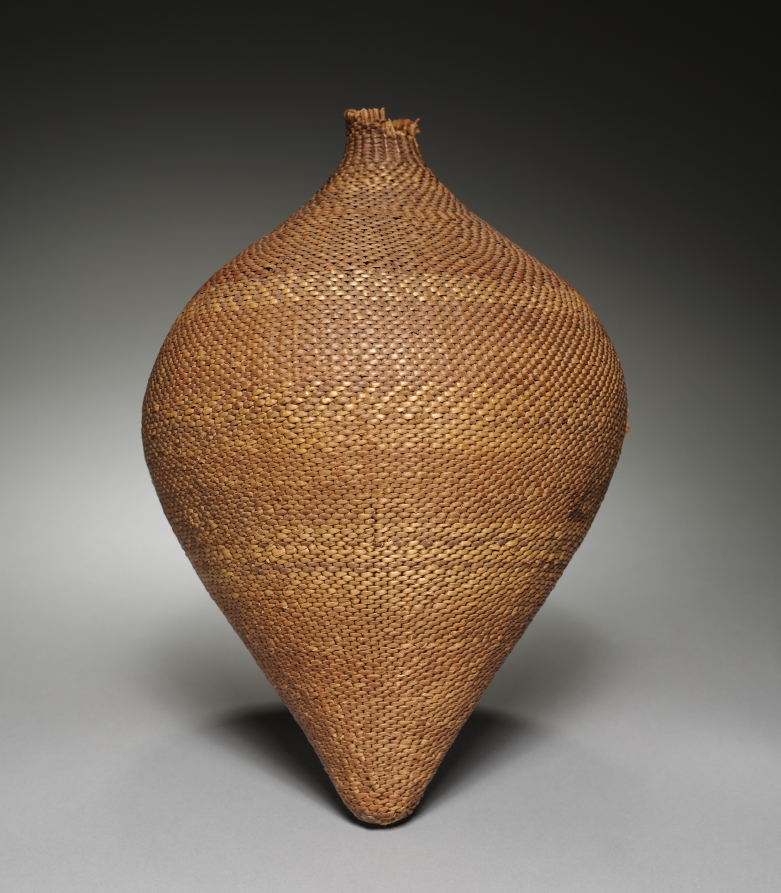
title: Seed Storage Jar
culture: Great Basin, Paiute, Kern County, Unassigned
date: Unassigned, before 1917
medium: peeled and unpeeled willow, diagonal twine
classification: Basketry